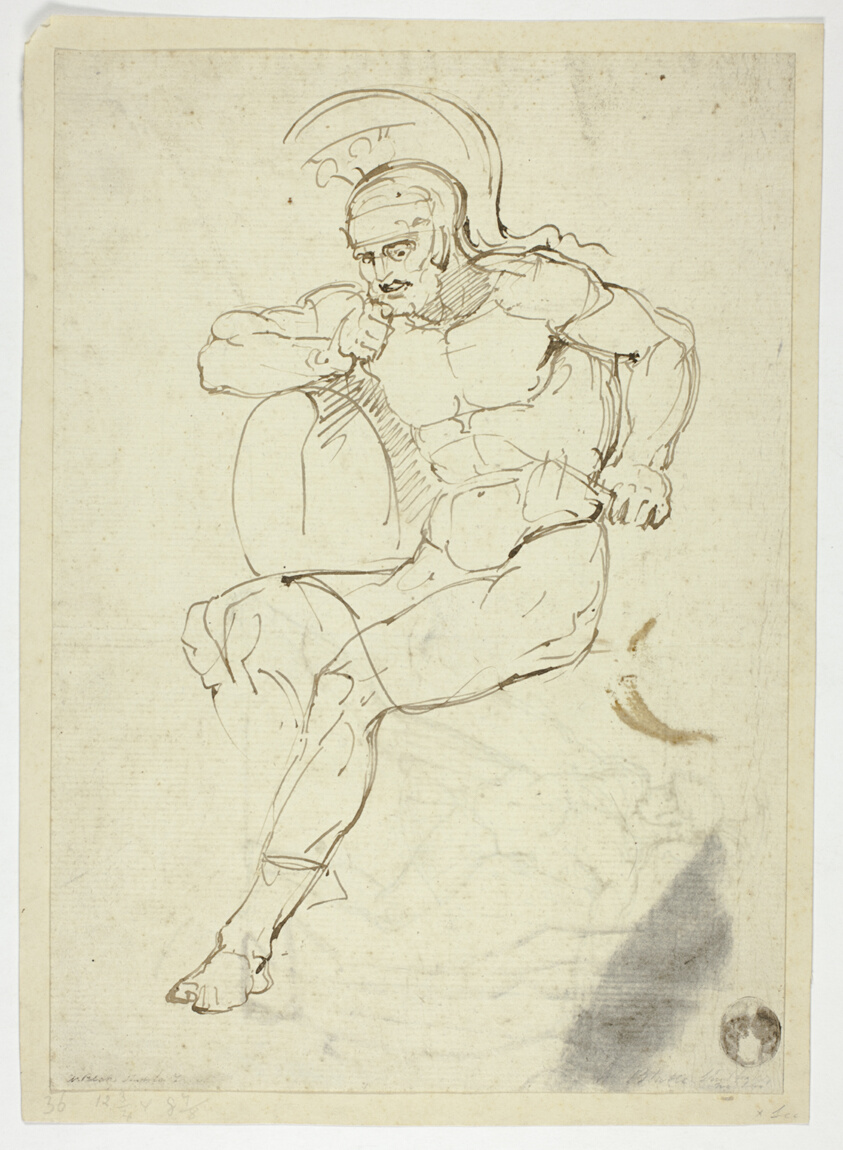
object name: Drawing and Watercolor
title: Seated Warrior (recto); Striding Warrior (verso)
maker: Follower of Henry Fuseli; Swiss, 1741-1825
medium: Pen and brown ink on ivory laid paper (recto and verso), tipped onto cream wove paper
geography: United Kingdom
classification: pen and ink drawings; drawings (visual works); prints and drawing